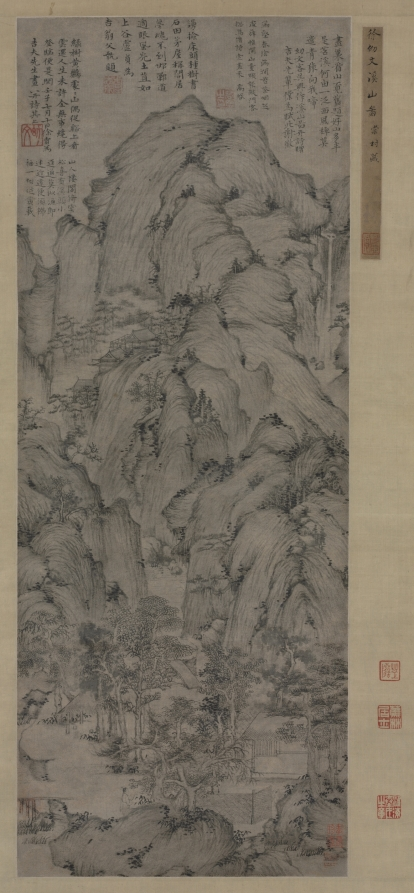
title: Streams and Mountains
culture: China, Yuan dynasty (1271-1368)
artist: Xu Ben (Chinese, 1335–1380)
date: 1372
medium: hanging scroll, ink on paper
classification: Painting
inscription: 綠樹黃鸝處處山， 偶從谿上看雲還。/ 人生未許全無事， 纔得登臨便是閑。 壬子七月十日徐賁為吉夫先生畫 並詩共上 [印] 幼文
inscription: Label on mounting probably by Liang Qingbiao 梁清標 (1620–1691).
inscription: 4 additional inscriptions and 9 additional seals: 1 poem of Xie Hui 謝徽 (c. 2nd half 14th c.); 1 poem and 1 seal of Gao Qi 高啟 (1336–1374); 1 poem and 1 seal of Lu Zhen 盧貞 (c. late 14th c.); 1 poem of Huang Zai 黃載; 3 seals of Liang Qingbiao 梁清標 (1620–1691); 1 seal of Wang Jiqian [C. C. Wang] 王季遷 (1907–2003); 3 seals unidentified.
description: Like many literati of the late Yuan and early Ming dynasties, Xu Ben was entangled with the perils of dynastic change as well as the ups and downs of his official career. It was mainly through the art of painting and poetry, as well as the ideal of reclusion, that he sought feelings of exhilaration and shared them with his friends. Xu created this monumental landscape during one of his periods of reclusion. His innumerable “hemp-fiber” texture strokes create a unifying rhythm among the towering mountains with tightly knit masses of rocks. Nestled among shady trees at the base of the mountain is a rustic retreat, which a scholar approaches on foot to visit with the hermit. Among the five inscriptions at the top of the painting is one by the artist himself. He dedicated the painting to someone named Jifu 吉夫 and recorded a poem in praise of mountains. Green trees, yellow orioles, everywhere are mountains; Aimlessly I return from the stream, where I watched the clouds. Man's life does not allow unbroken ease, But to be able to be high up in the mountain, this is leisure.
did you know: An attendant opens a reed gate to welcome the scholar with a walking stick approaching the rustic retreat.